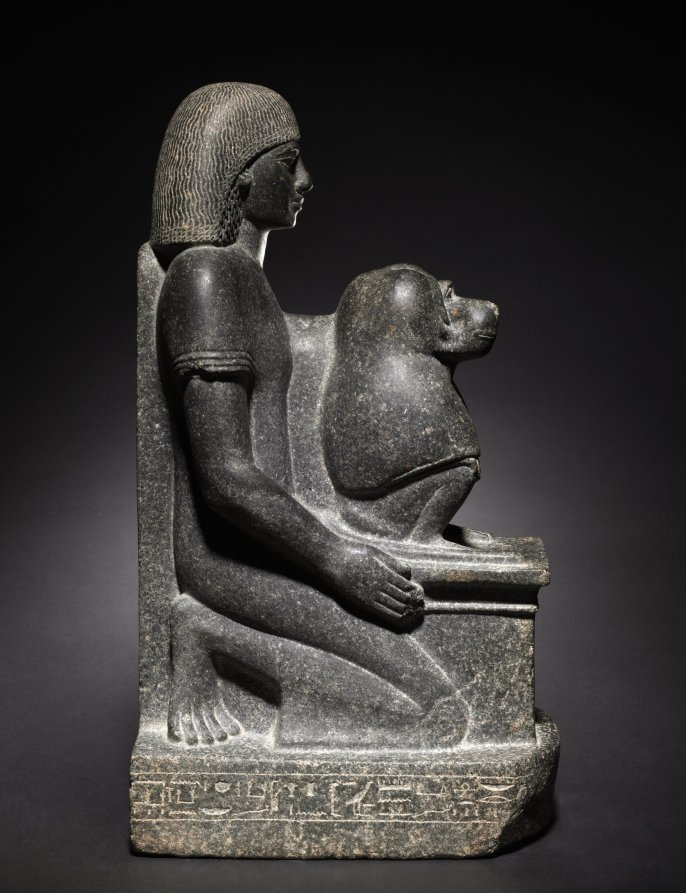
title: Statue of Minemheb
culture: Egypt, New Kingdom (1540–1069 BCE), Dynasty 18, reign of Amenhotep III (1390–1352 BCE)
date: c. 1391–1353 BCE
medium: granodiorite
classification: Sculpture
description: Minemheb was one of the many court officials who helped prepare for Amenhotep III's 30-year jubilee festival. Clearly, Minemheb regarded this as the high point of his career, since his title as chief of construction for the jubilee temple is the primary one provided on this statue. It is actually a statue within a statue: Minemheb kneels to present a small altar, upon which squats a statue of the god Thoth in baboon form. Carved in extremely hard stone, Minemheb's statue is nonetheless carefully detailed and superbly modeled. Special attention was given to the rendering of the baboon's face. The heavy-lidded eyes and furrowed brow give the animal an almost contemplative expression.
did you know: The baboon in this sculpture is the god Thoth in one of his animal forms.